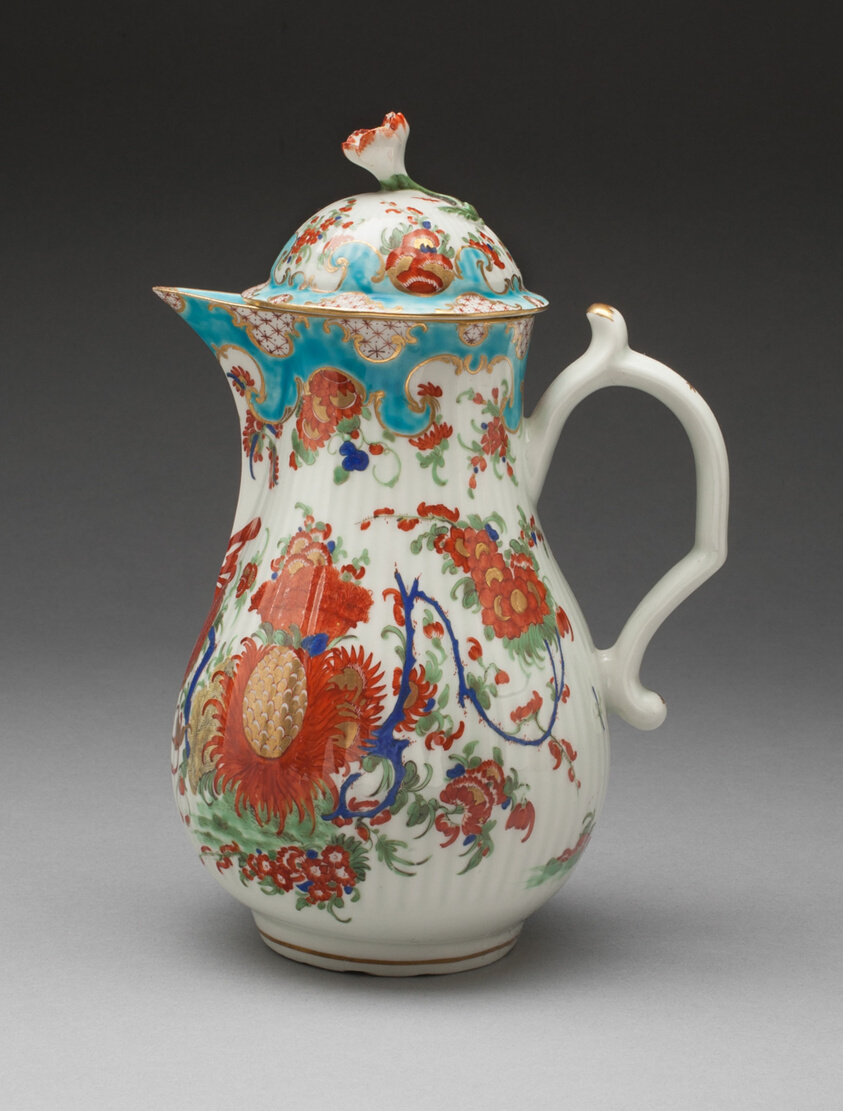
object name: Ceramics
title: Coffee Pot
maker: Worcester Porcelain Factory (Warmstry House Period, 1751–1783); Worcester, England, founded 1751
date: c. 1775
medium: Soft-paste porcelain, polychrome enamels and gilding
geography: Worcester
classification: ceramics; teaware; porcelain; european decorative arts